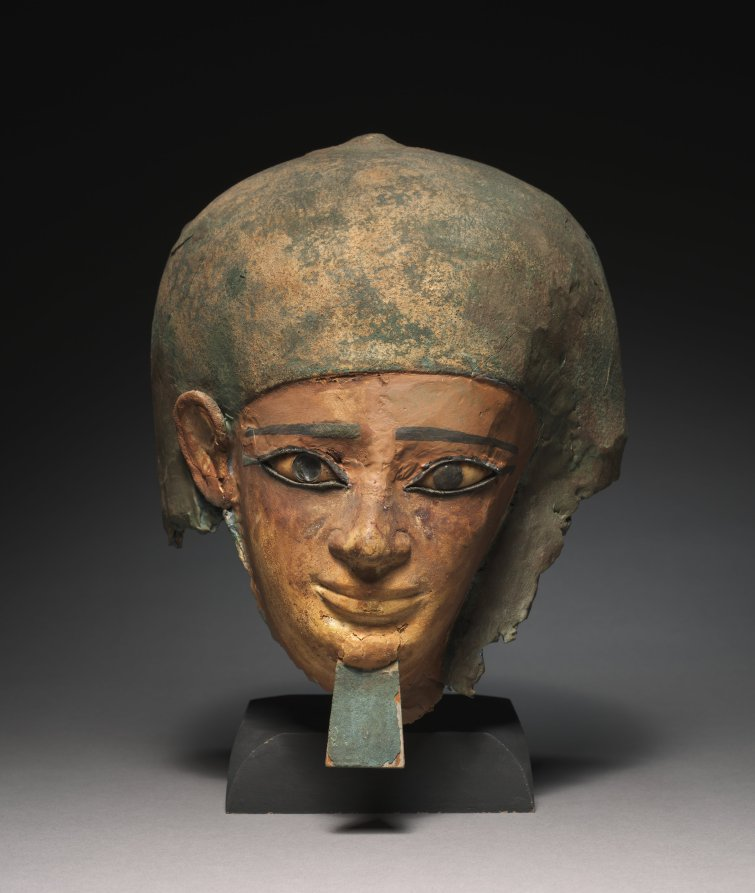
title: Mummy Mask of Senbi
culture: Egypt, Meir, Middle Kingdom (2040–1648 BCE), Dynasty 12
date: 1980–1801 BCE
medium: cartonage, wood, limestone, obsidian, paint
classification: Funerary Equipment